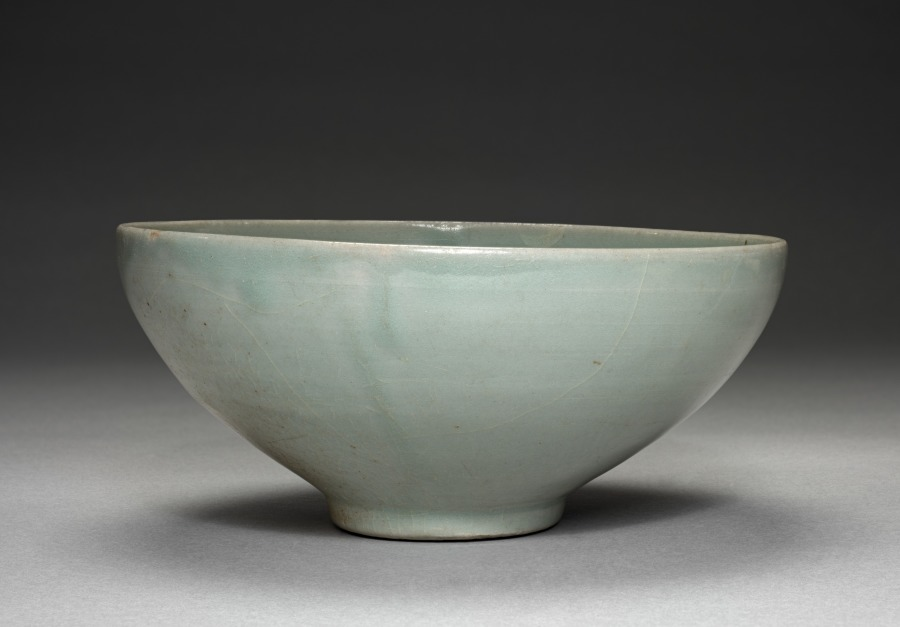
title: Bowl with Incised Parrot Design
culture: Korea, Goryeo dynasty (918–1392)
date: 1100s-1200s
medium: glazed porcelain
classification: Ceramic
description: As early as the 600s, the practice of drinking tea and wine became an important part of elite leisure culture in Korea. A wide bowl like this example was especially suitable for drinking powdered tea shaved from a compressed tea cake, the most commonly enjoyed type during the Goryeo period. The image of flying parrots inscribed on the inner wall of this tea bowl may have made the moment of drinking tea much enjoyable.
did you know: On the base of this tea bowl, three small spur marks made of bits of clay remain visible, indicating an individual protective casing of fire clay (saggar).